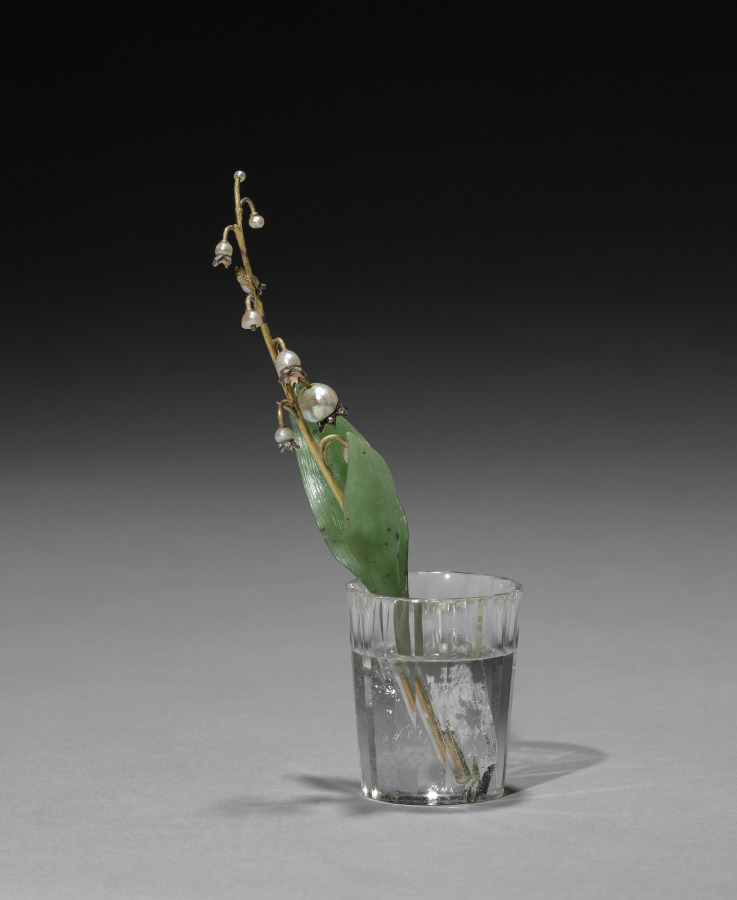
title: Flower Study of a Lily of the Valley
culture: Russia, St. Petersburg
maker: House of Fabergé (Russian, 1842–1918)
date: c. 1885–1915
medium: pearls, diamonds, jade, rock crystal, silver, gold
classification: Miscellaneous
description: This flower study resembles a stem of lily-of-the-valley. Fabergé’s inspiration for his flower studies is said to have come from the floral brooches of precious stones that were made in the 1700s for Catherine the Great as well as from the Japanese art of flower arranging, known as ikebana. Small and delicate, Fabergé’s flower studies were given as intimate gifts to friends by the tsarina and others in the court. She also liked to take them around to wherever the imperial family was residing as a reminder of spring during the harsh Russian winters.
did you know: The stems of Fabergé’s flower studies are set into little basins carved from rock crystal to resemble pots of water.